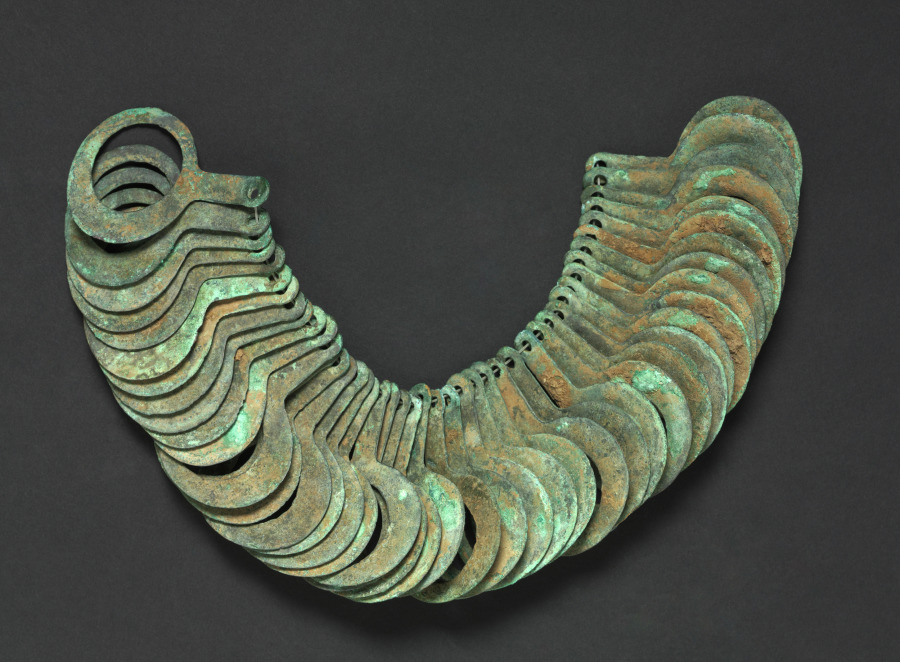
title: Bronze Necklace with Hanging Pendants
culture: Northern Greece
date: 700s BCE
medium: bronze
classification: Jewelry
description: 45 separately cast pendants overlap one another when strung together and hung, reversing course at the bottom.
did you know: The green patina of this bronze necklace is a result of the oxidation process.